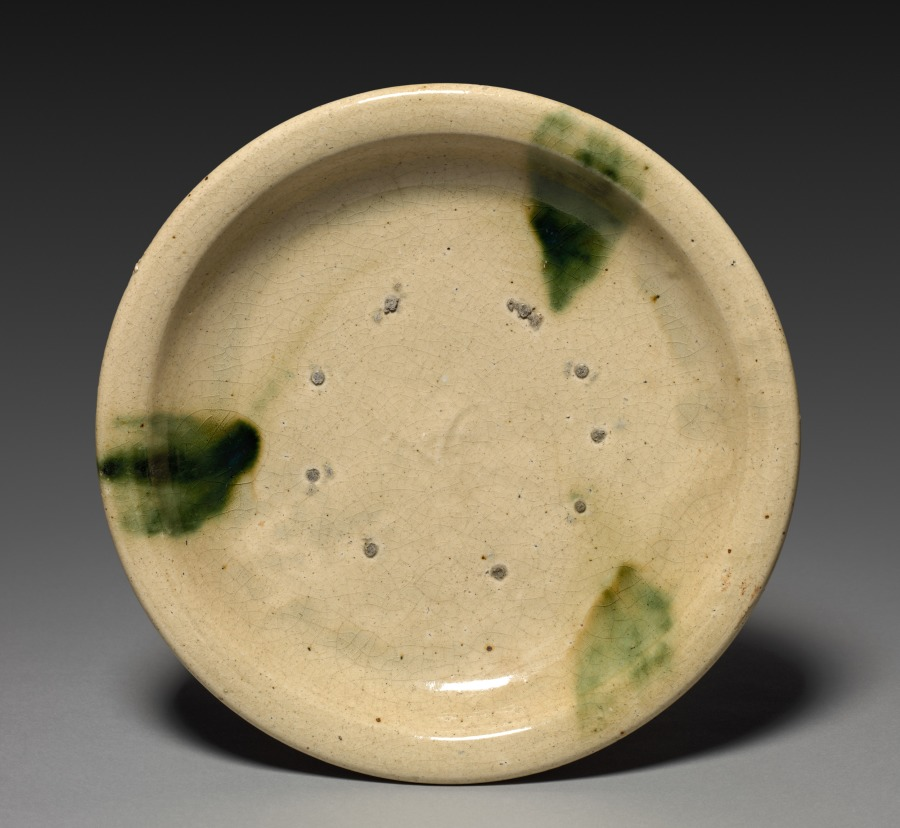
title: Plate: Seto Ware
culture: Japan, Edo period (1615–1868)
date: 1700s to mid-1800s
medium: glazed stoneware (Seto ware)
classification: Ceramic